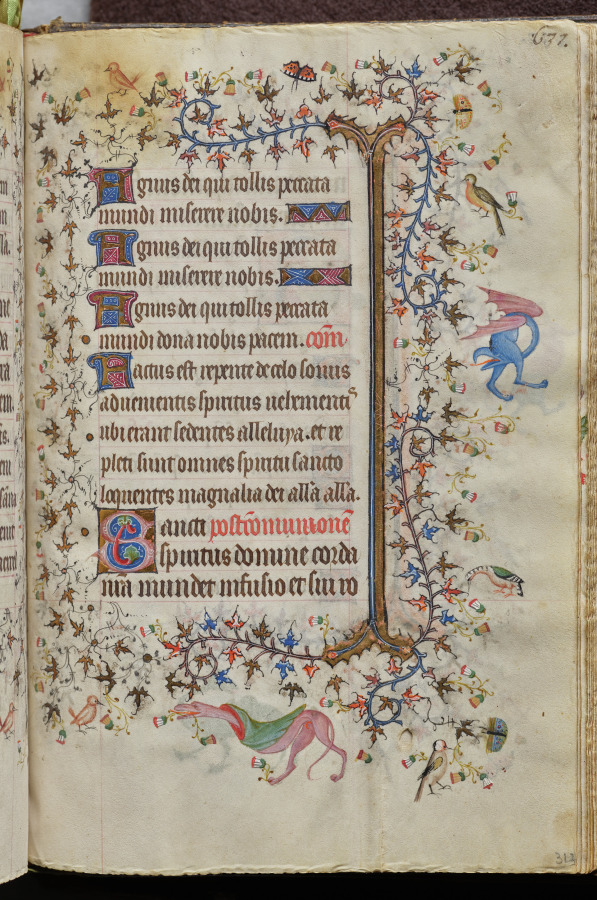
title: Hours of Charles the Noble, King of Navarre (1361-1425), fol. 313r, Text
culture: France, Paris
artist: Master of the Brussels Initials and Associates (French)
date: c. 1405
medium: ink, tempera, and gold on vellum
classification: Bound Volume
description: This precious volume was obviously highly prized by its owner, the French-born King of Navarre, who had his coat of arms painted on no less than twenty folios. Rather than directly commissioning this manuscript from a specific workshop, it seems that Charles the Noble acquired his book of hours -- perhaps ready-made for the luxury market -- while on a trip to Paris in 1404-05. A collaborative effort, six painting styles are evidenced within the pages of this codex, those of two Italians, two Frenchmen, and two Netherlanders. The painter who was responsible for the planning and decoration of the book, and who produced seventeen of the large miniatures, was a Bolognese artist known as the Master of the Brussels Initials. His principal assistant, responsible for most of the borders, was a Florentine who signed his name "Zecho" da Firenze on folio 208 verso.